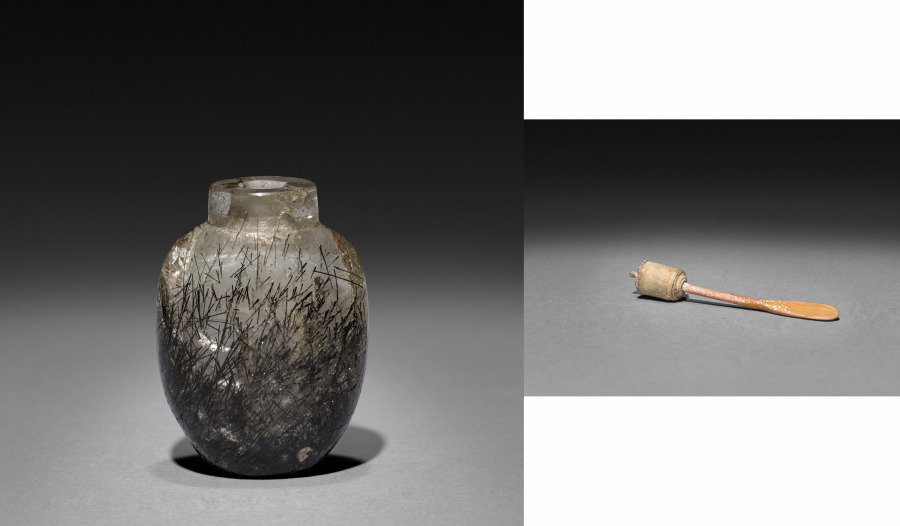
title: Snuff Bottle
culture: China, Qing dynasty (1644-1911)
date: 1644–1911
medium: glass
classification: Glass